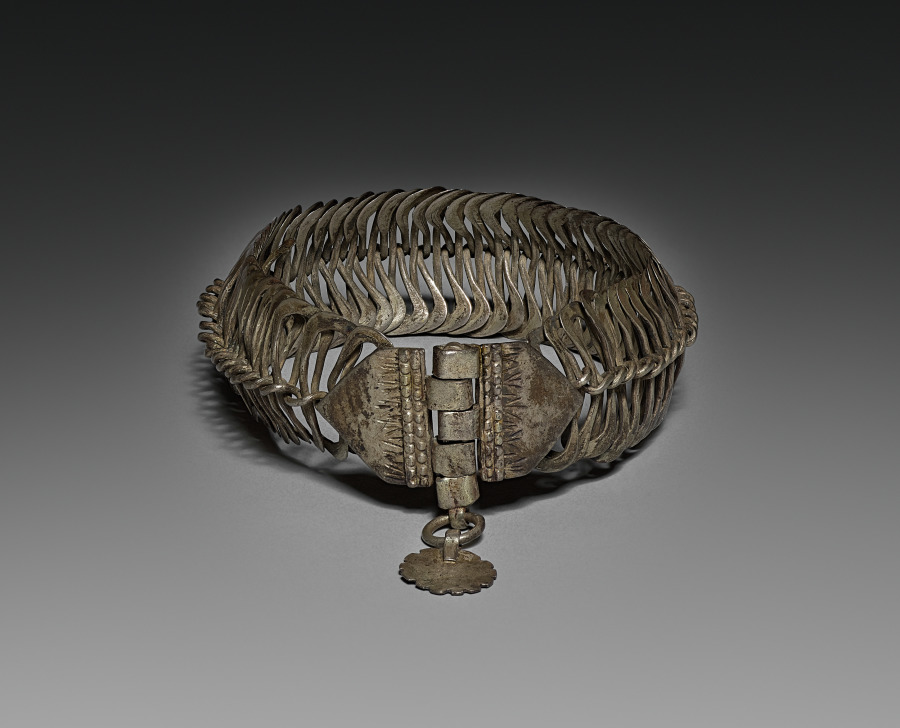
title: Bracelet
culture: India (?)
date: 1800s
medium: silver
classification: Jewelry